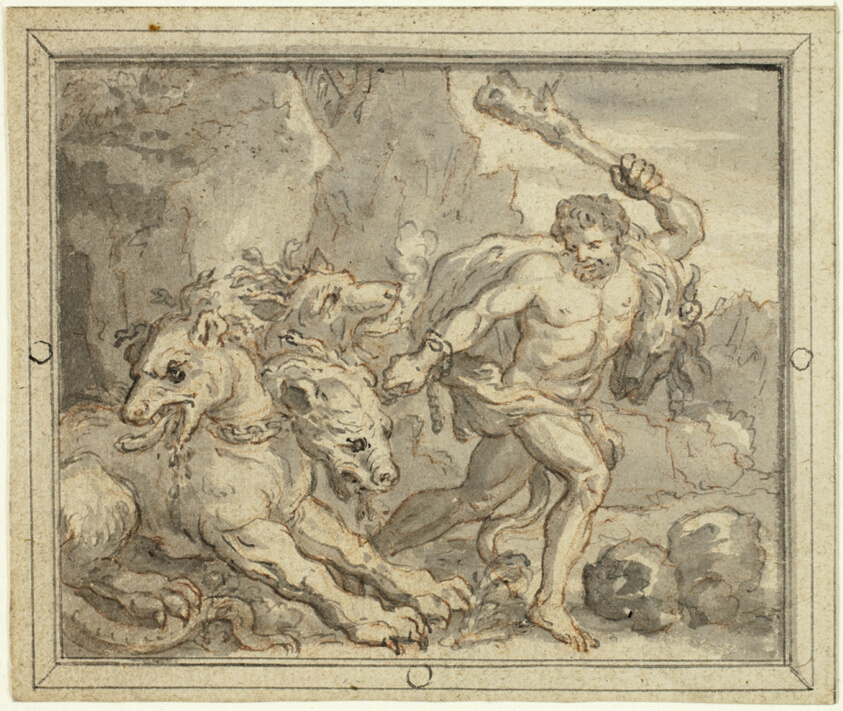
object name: Drawing and Watercolor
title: Hercules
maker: Richard van Orley; Flemish, 1663–1712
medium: Pen and brush and gray wash, with red chalk, on ivory laid paper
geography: Flanders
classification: drawings (visual works); prints and drawing